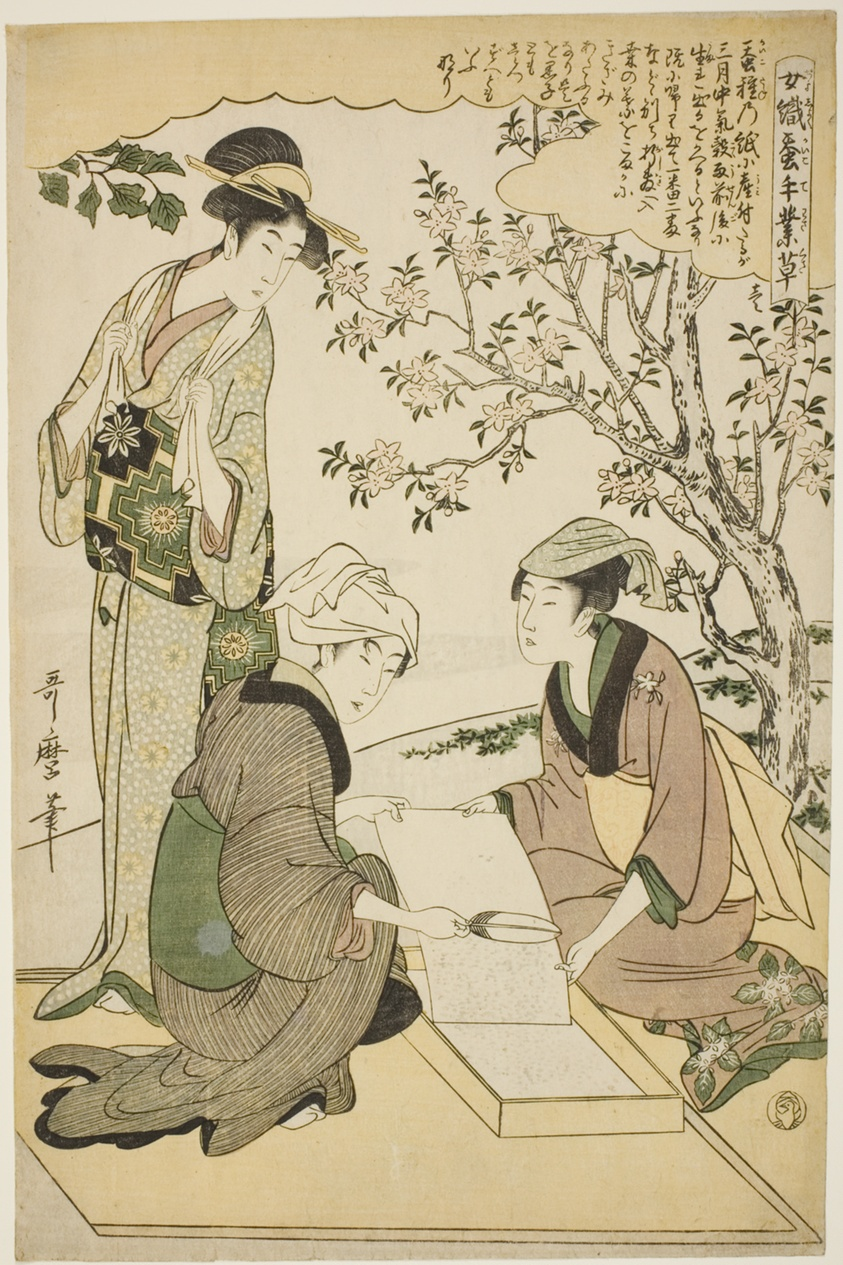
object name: Print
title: No. 1 (ichi), from the series "Women Engaged in the Sericulture Industry (Joshoku kaiko tewaza-gusa)"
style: Japanese (culture or style)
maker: Kitagawa Utamaro 喜多川 歌麿; Japanese, 1753 (?)-1806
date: c. 1798/1800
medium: Color woodblock print; oban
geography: Japan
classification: woodblock print; print; asian art